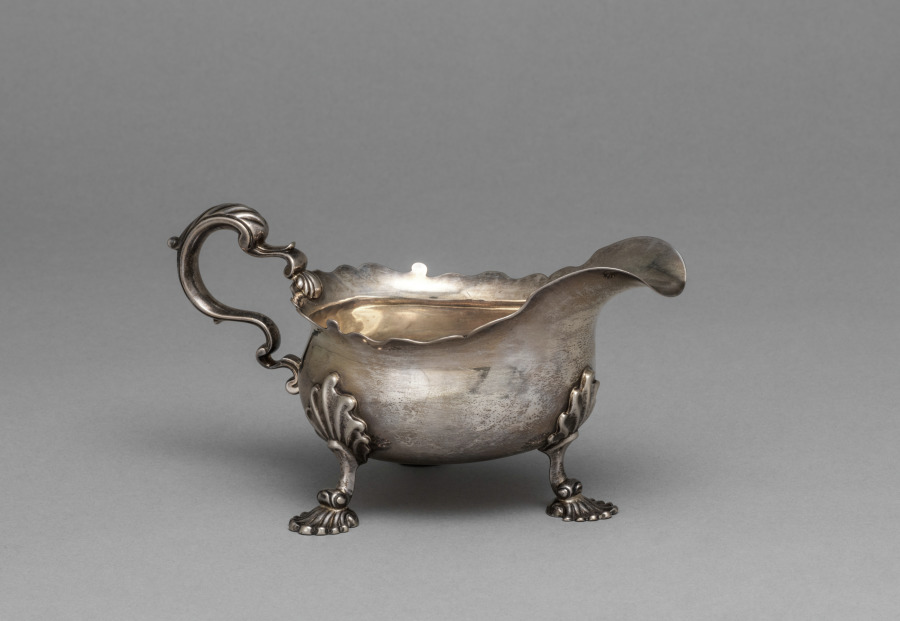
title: Gravy Boat (2 of 2)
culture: England, 18th century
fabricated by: Samuel Wood (British)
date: 1746–1747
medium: silver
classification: Silver